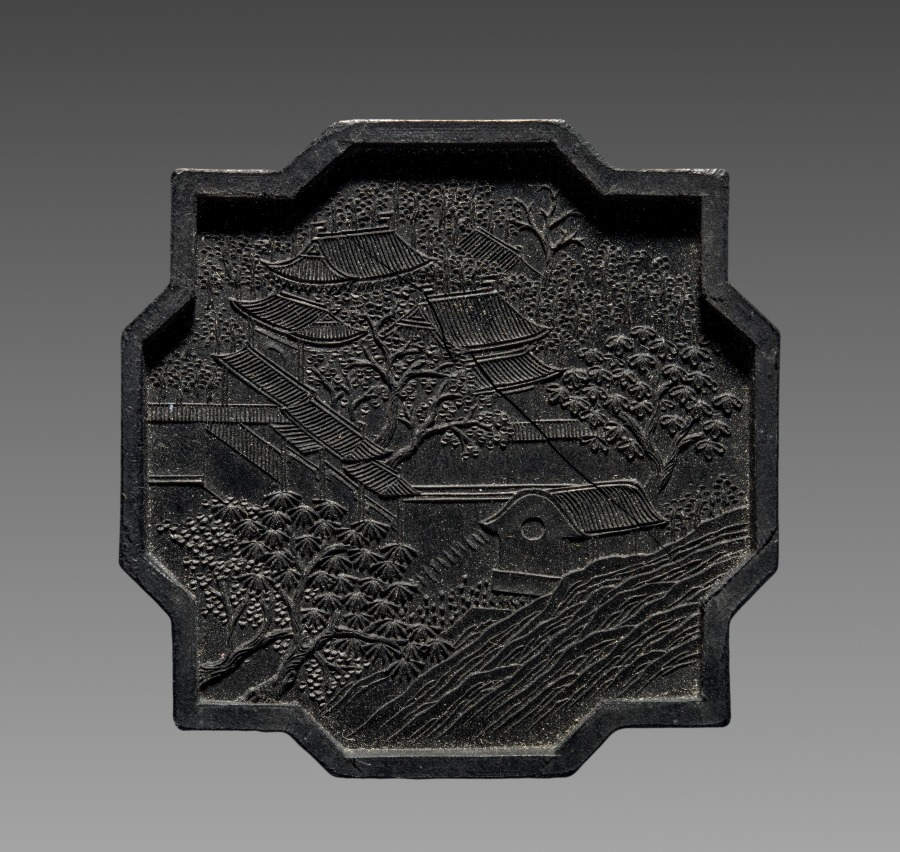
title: Ink Stick from an Imperially Commissioned Set of Ink Stick with Images and Poems of Famous West Lake Sites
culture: China, Qing dynasty (1644–1911), Qianlong reign (1736–95)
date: 1780–94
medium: Molded ink in black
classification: Miscellaneous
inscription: 御製南屏晚鍾庚子。 幾暇搜冥對硯屏， 霜鐘送響一聲聲， 鬢霜已改十年貌， 醒耳清音卒未更。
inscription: 乾隆年製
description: This is one of ten ink cakes of different shapes and colors stored in an exquisite lacquer box. Each is inscribed in gold with a poem by the Qianlong emperor, praising the ten famous sights of the Westlake in Hangzhou, near Shanghai. The Westlake is famous for its natural beauty; it was a favorite imperial destination and remains a tourist attraction today. Ink cakes (also called ink sticks) are dissolved with the addition of water and ground on the surface of a flat stone into liquid ink for painting and calligraphy. The precious ink cakes here, however, have never been used.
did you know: The design is Jingci Temple, a Buddhist temple beside West Lake in Hangzhou, China.